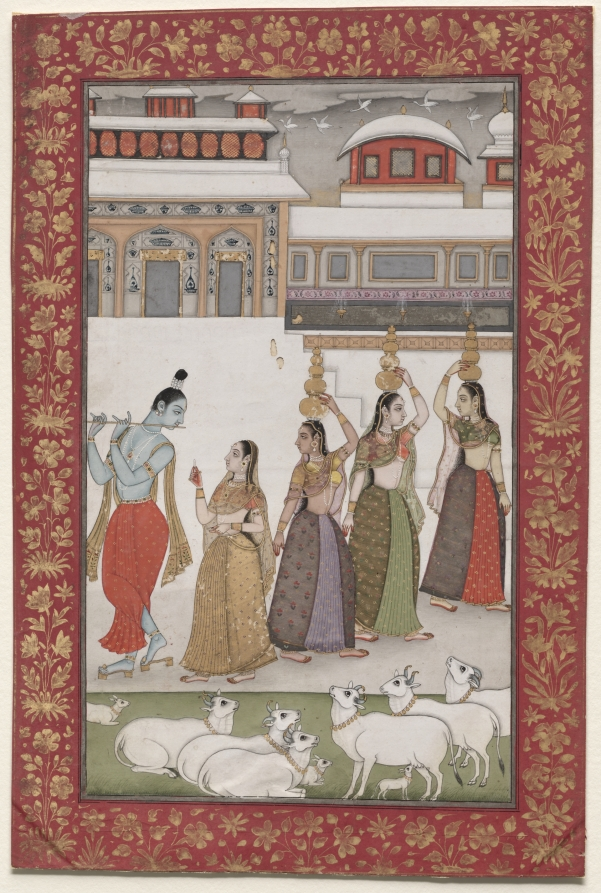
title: Gujari Ragini (Krishna with Gopis Playing the Flute), from a Ragamala Series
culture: India, Deccan, Aurangabad, 18th century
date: mid-1700s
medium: Gum tempera, ink, and gold on paper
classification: Painting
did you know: Krishna is wearing paduka sandals, which have a post and a stub to provide grip between the big and second toes.